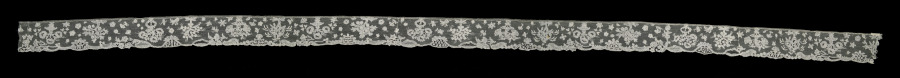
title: Lace Edging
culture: Belgium, Brussels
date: 1740–60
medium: Bobbin lace (Point d'Angleterre)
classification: Lace